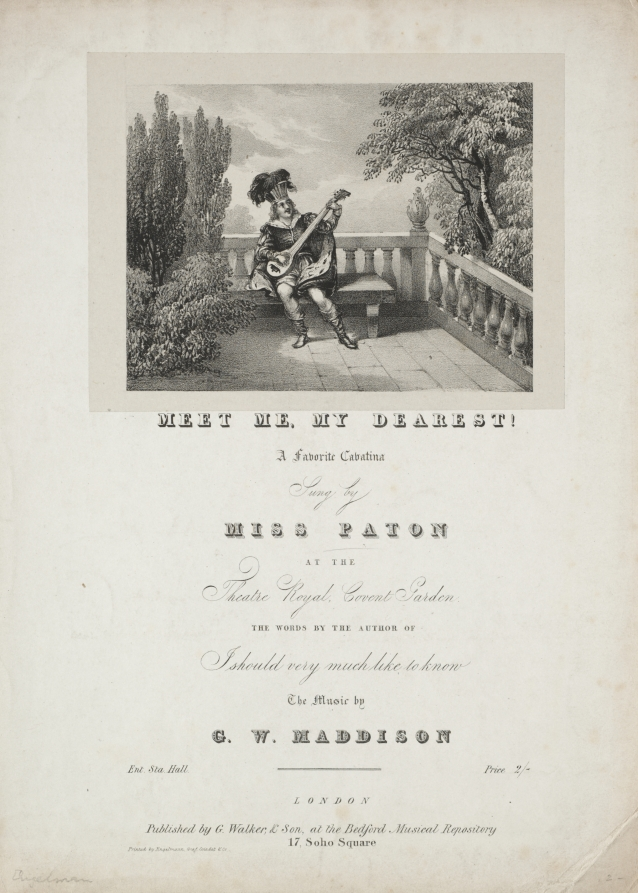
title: Meet Me, My Dearest!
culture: England, 19th century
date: 1800s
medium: lithograph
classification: Print